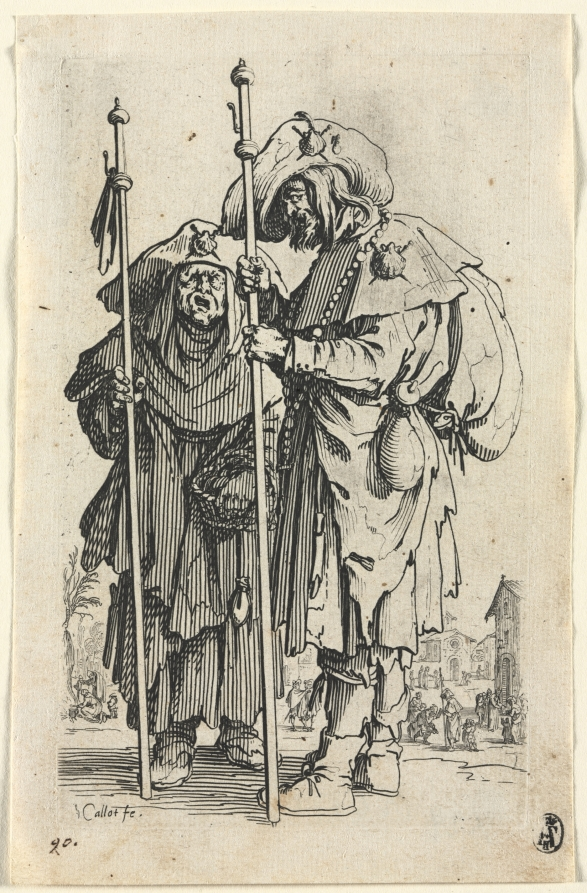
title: The Beggars: The Two Pilgrims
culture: France, 17th century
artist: Jacques Callot (French, 1592–1635)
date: c. 1623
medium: etching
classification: Print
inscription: Inscribed lower left in pen and brown ink: "90."